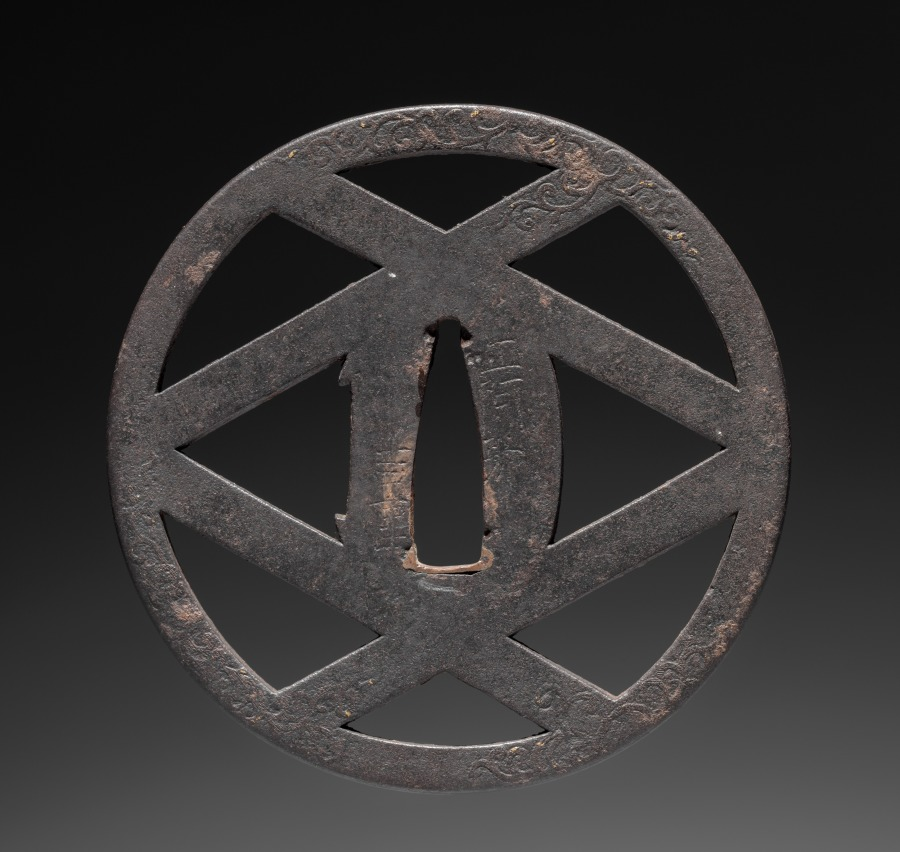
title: Sword Guard (Tsuba)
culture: Japan, possibly Edo period (1615-1868)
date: c. 1615–1868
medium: iron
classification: Arms and Armor